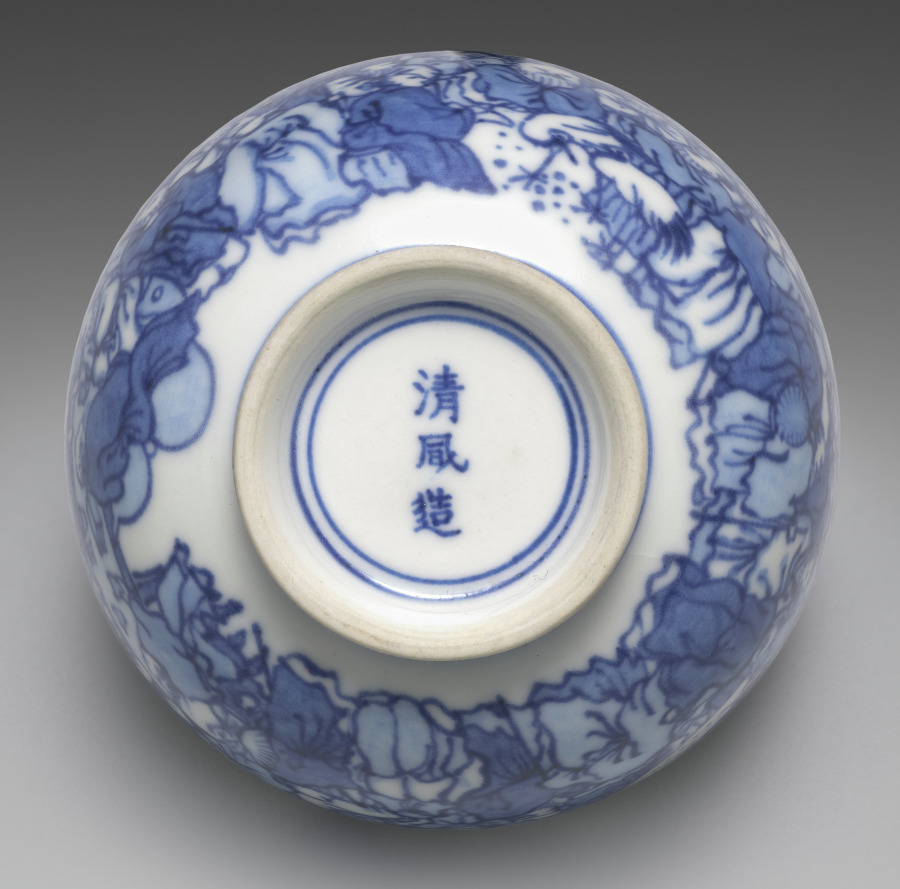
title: Teacup from Teacups with a Hundred Sages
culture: Japan, Meiji period (1868–1912)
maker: Seifū Yohei III (Japanese, 1851–1914)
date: 1893–1914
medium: One from a set of five teacups; porcelain with underglaze blue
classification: Ceramic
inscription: 清風造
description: Each of these five teacups has a painting of identical design in underglaze blue, but as the tiny figures are drawn entirely by hand, each cup has its own personality. The theme of the sencha cups is an assembly of sages or immortals, literally “a hundred venerable [people]” (hyakurō). The myriad figures crowd the scene in groups. The god of longevity, with his tall forehead, sits with his cranes, having flown in from Mt. Penglai on the Isle of the Immortals. Seven long-bearded sages sit around a stone table, chatting and drinking; one is seated on an enormous gourd. Of course, there is a stack of books on the table, and elsewhere, scrolls are being written upon or read—in one case held very close by a sage who is wearing glasses. The design was enormously popular in ceramics made for those engaged in literati culture.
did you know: Seifū Yohei III (1851–1914) produced many works for tea gatherings where people drank Chinese-style leaf-tea (sencha).